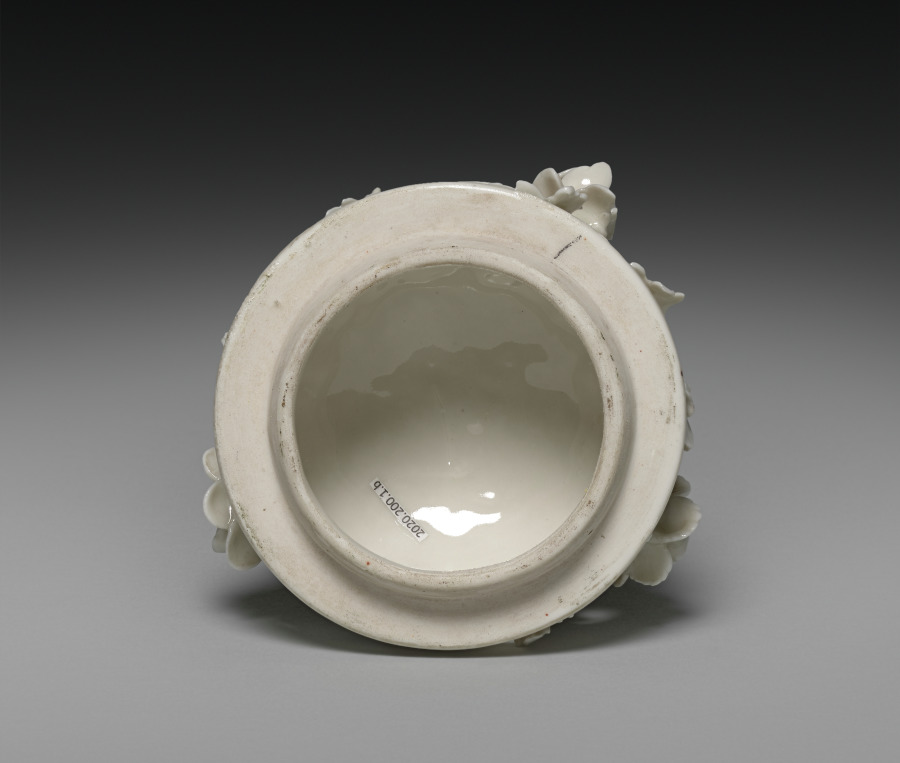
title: Cover for a Potpourri Vase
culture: France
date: 1860–1880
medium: blanc-de-chine porcelain; gilt bronze mount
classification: Ceramic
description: This cover is part of a pair of covered vases that were created to contain potpourri, a mixture of flowers, herbs, and spices emitting ambient fragrance. This specific function offered a particularly fertile ground for the development of French porcelain from the mid-1700s, as manufactories experimented with forms, surface ornamentations, and placement of perforations. Produced by the firm of Edmé Samson in the 1800s, the vases pay homage to this history. While using updated technique and material, as well as more exuberant decorations, these vases draw upon designs by earlier innovators such as the Saint-Cloud manufactory.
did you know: Potpourri vases always have holes in the top to let the scent of dried spices and flowers contained within freshen the air around them.